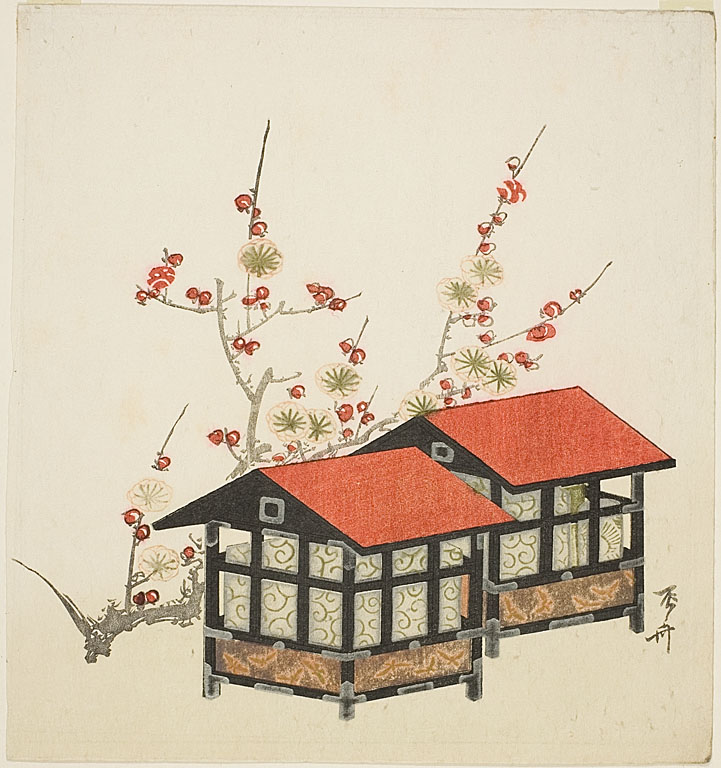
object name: Print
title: Bird Houses and Plum Branch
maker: Ryuryukyo Shinsai (Japanese, about 1764-1820)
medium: Color woodblock print; surimono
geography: Japan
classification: woodblock print; print; asian art